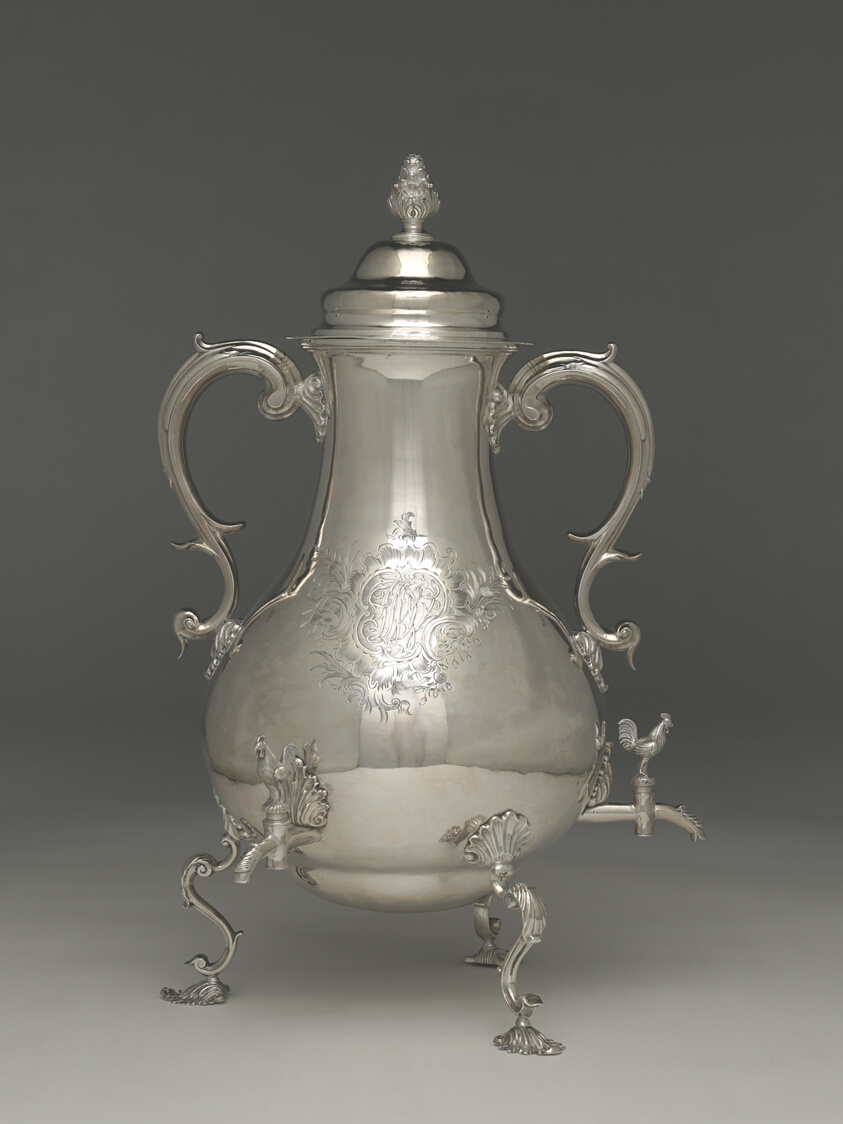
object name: Metalwork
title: Urn with Cover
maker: Ephraim Brasher; American, 1744–1810; New York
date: c. 1770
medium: Silver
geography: New York City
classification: vessel for serving drinks; silver; american decorative arts; american arts; decorative arts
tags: dining, drinking